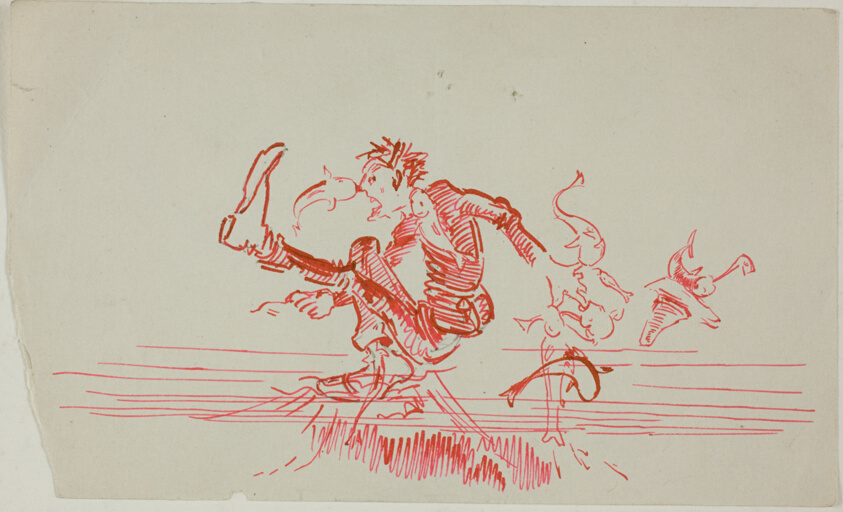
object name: Drawing and Watercolor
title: Man Attacked by Several Fish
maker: Anders Zorn (Swedish, 1860-1920)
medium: Pen and red ink over traces of graphite, on ivory wove paper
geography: Sweden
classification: pen and ink drawings; drawings (visual works); prints and drawing